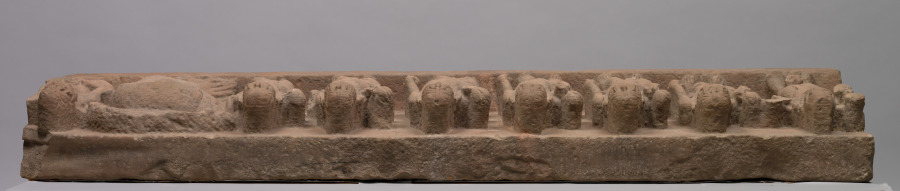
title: Nine Celestial Bodies (Navagraha)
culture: Central India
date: 700s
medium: Sandstone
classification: Sculpture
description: Near temple entrances, the nine celestial bodies were depicted in an orderly row, often in figural form. From left to right they are: Sun with a tall crown and the female Dawn in front of him. The next five figures are nearly identical: Moon, Mercury, Venus, Mars, and Jupiter. As a portent of doom, Saturn was wounded by a goddess to prevent him from moving swiftly, so he stands on one leg. The bodiless head is Rahu, the eclipse, who swallows the moon until it falls out his neck. The serpent-tailed figure is a comet.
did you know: The Sun (Surya) is the only figure who wears boots and holds fully open lotus flowers.